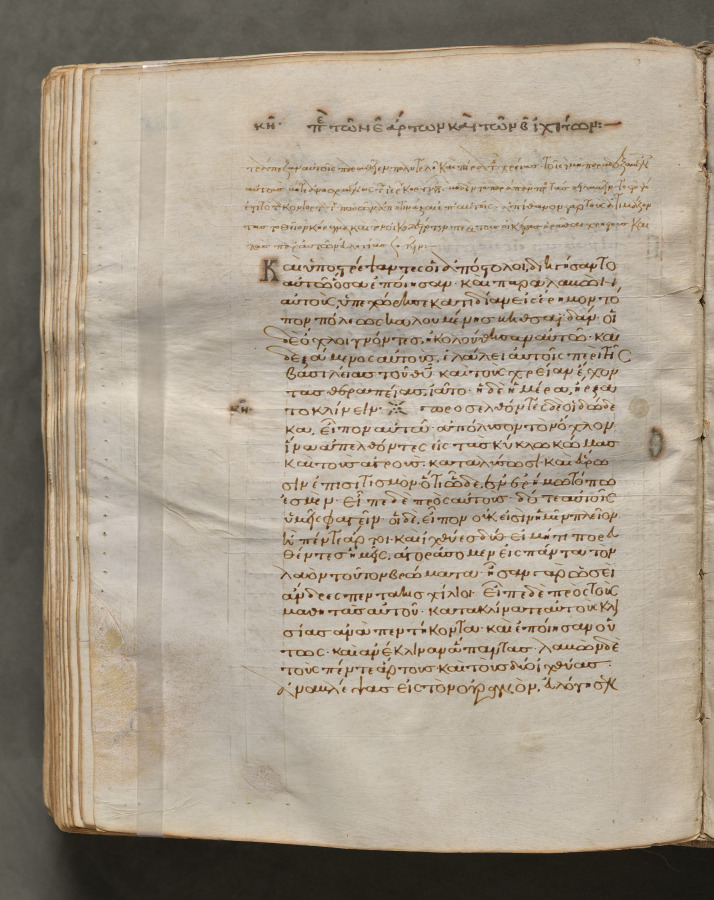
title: Text, folio 245 (verso), from a Gospel Book with Commentaries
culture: Byzantium, Constantinople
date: c. 1000–1100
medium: ink, tempera, and gold on vellum; leather binding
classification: Bound Volume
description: Each of the four gospels in this book opens on a page with brilliantly illuminated borders depicting the author of the text as well as birds—principally peacocks, symbols of the immortality of the soul—and fountains, representing the fountain of life and the salvation of the soul. This volume consists of 428 leaves with texts in Greek. Its level of sophistication suggests that it was probably written and decorated in a monastery in Constantinople.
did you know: Gospel books were carried in procession through Byzantine churches.